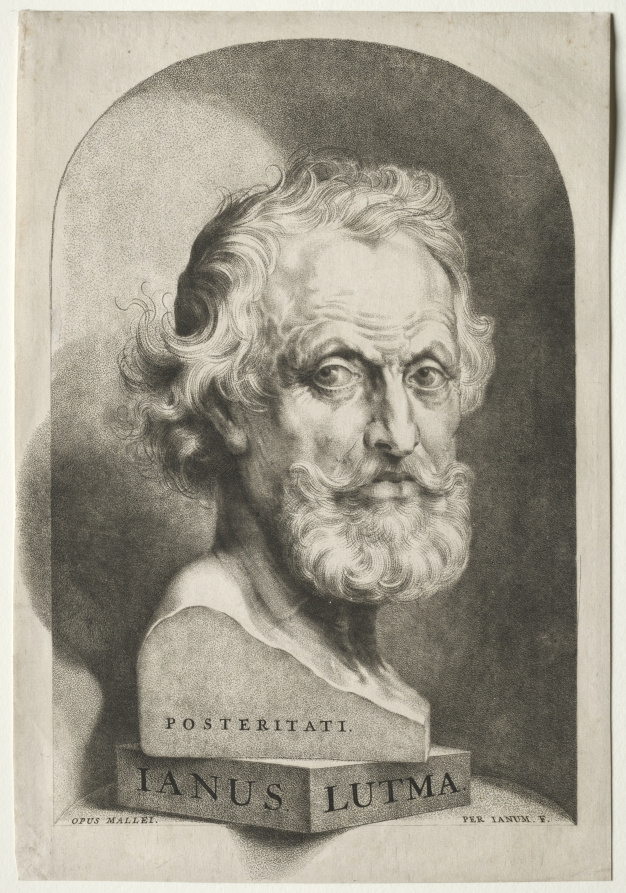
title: Portrait of Janus Lutma the Elder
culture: Netherlands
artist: Jan Lutma II (Dutch, 1624–1685)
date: after 1669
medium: punch engraving, roulette, and engraving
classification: Print